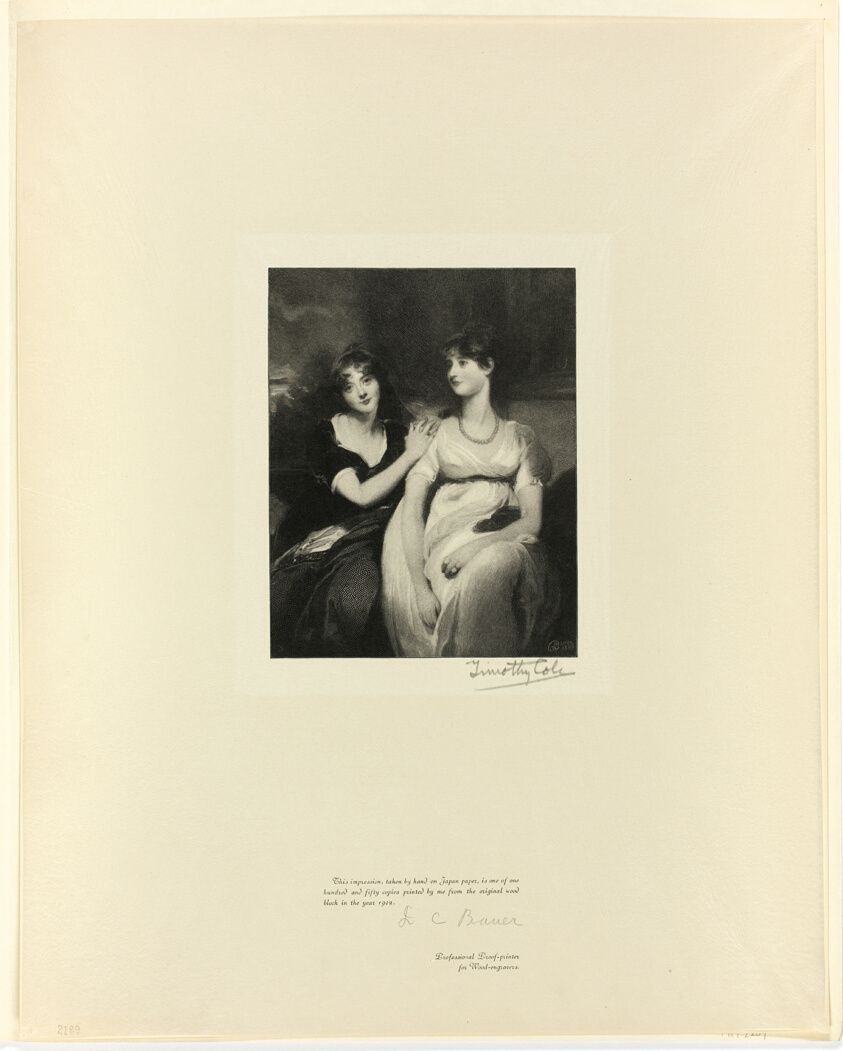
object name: Print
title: The Sisters, from Old English Masters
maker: Timothy Cole (American, born England, 1852-1931); after Sir Thomas Lawrence (English, 1769-1830)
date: 1900, printed 1902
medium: Wood engraving on chine paper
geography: United States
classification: wood engraving; print; prints and drawing